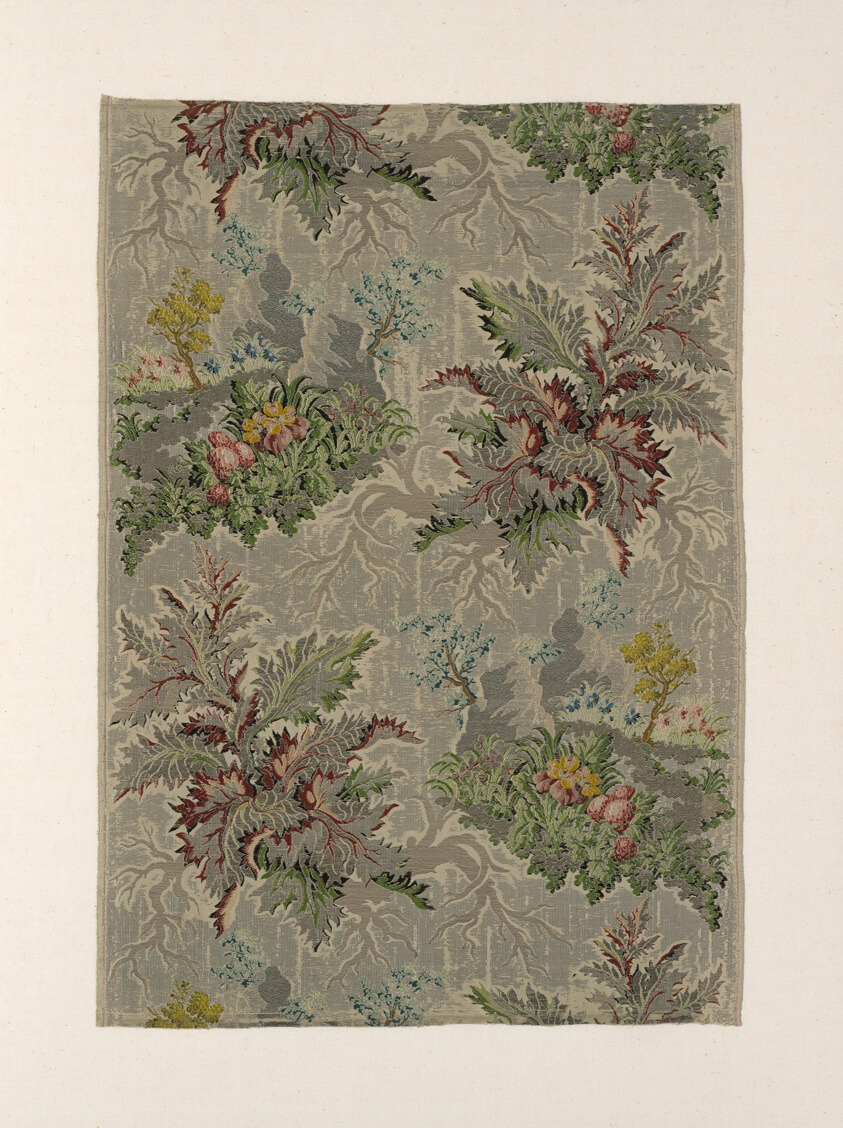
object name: Textile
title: Panel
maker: France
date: c. 1734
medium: Silk, silvered-metal strips, and gilt- and silvered-metal-strip-wrapped silk, plain weave with twill interlacing of secondary binding warps and some supplementary brocading wefts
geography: France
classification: textile; weaving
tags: flowers, fruit, trees